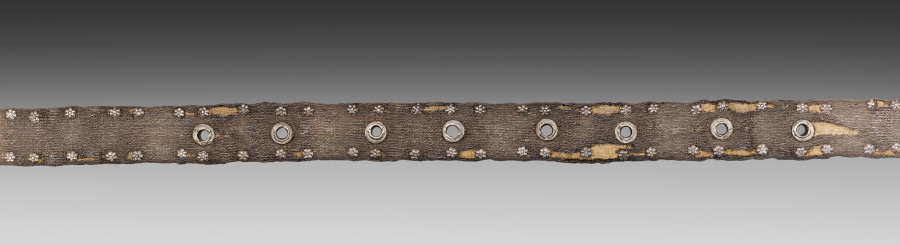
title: Belt for a Lady's Dress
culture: Italy, Siena(?)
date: c. 1375–1400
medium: basse-taille enamel and gilding on silver, silver thread, gilt-silver buckle, cast and chased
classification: Jewelry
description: Because of its extraordinary richness, this belt (also known as a girdle) was both an ornament for the body and an object of great personal luxury. Almost eight feet in length, belts like this were at the height of fashion for both men and women. After being passed around the waist and through the buckle, one end of the belt would fall to the hem of the garment. The belt's many colorful enamel plaques are worked in translucent enamel over decoration engraved into the silver beneath (an enameler's technique known as basse-taille). Within the plaques and cast into the buckle are scenes of courtly love, musicians, and fantastic animals. A large number of translucent enamels were made for secular objects during the late Middle Ages for use on jewelry, cups, garment clasps, and similar objects. This belt is a rare survival among these now scarce objects.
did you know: Look closely at the tiny scenes of courtly love on the plaques that adorn this belt. Given their size, these scenes were designed for the enjoyment of the woman who wore this belt over a sumptuous dress rather than an admirer from a distance.